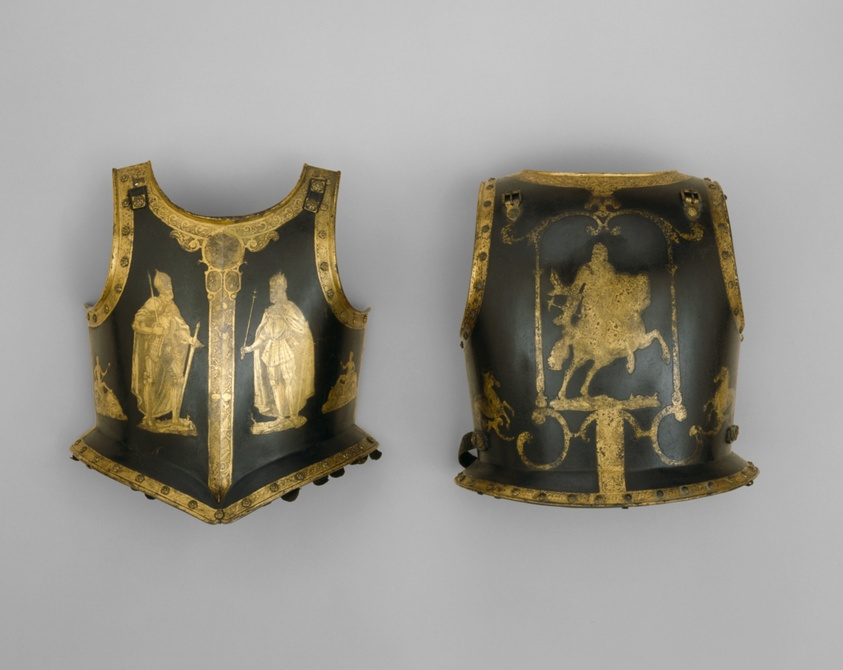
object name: Armor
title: Zischägge (Helmet) and Cuirass of Emperor Ferdinand II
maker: South German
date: c. 1620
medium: steel, gilding, brass, and leather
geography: Southern Germany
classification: suit-element; armor; arms and armor